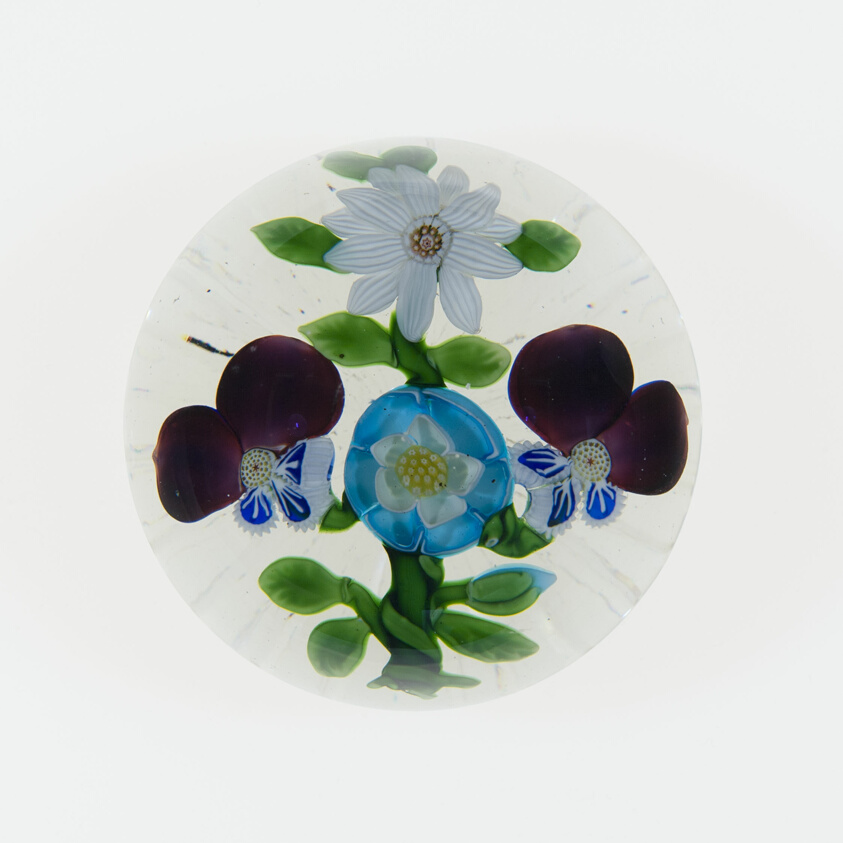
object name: Glass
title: Paperweight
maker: Baccarat Glassworks (Cristalleries de Baccarat); Lorraine, France, founded 1764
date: c. 1845–60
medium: Glass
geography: Baccarat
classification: paperweight; glass